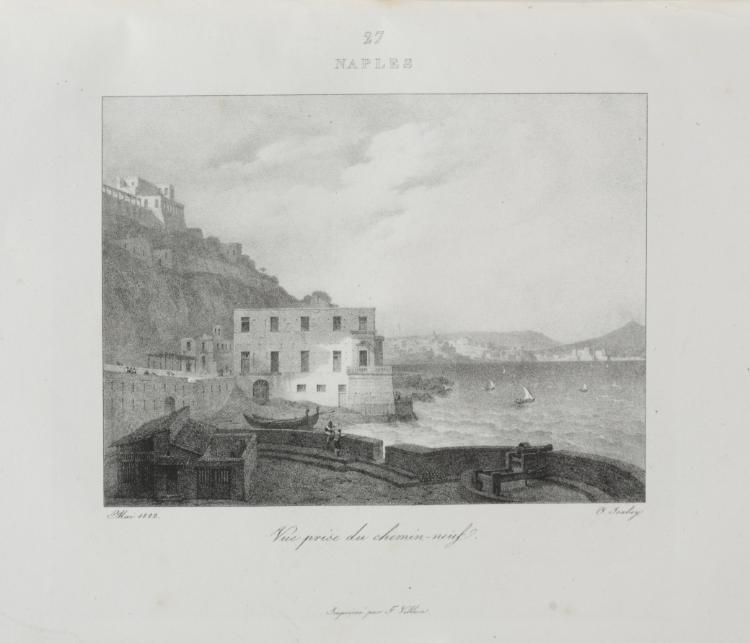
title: Voyage en Italie en 1822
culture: France, 19th century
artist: Jean-Baptiste Isabey (French, 1767–1855)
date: 1833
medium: lithograph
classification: Bound Volume